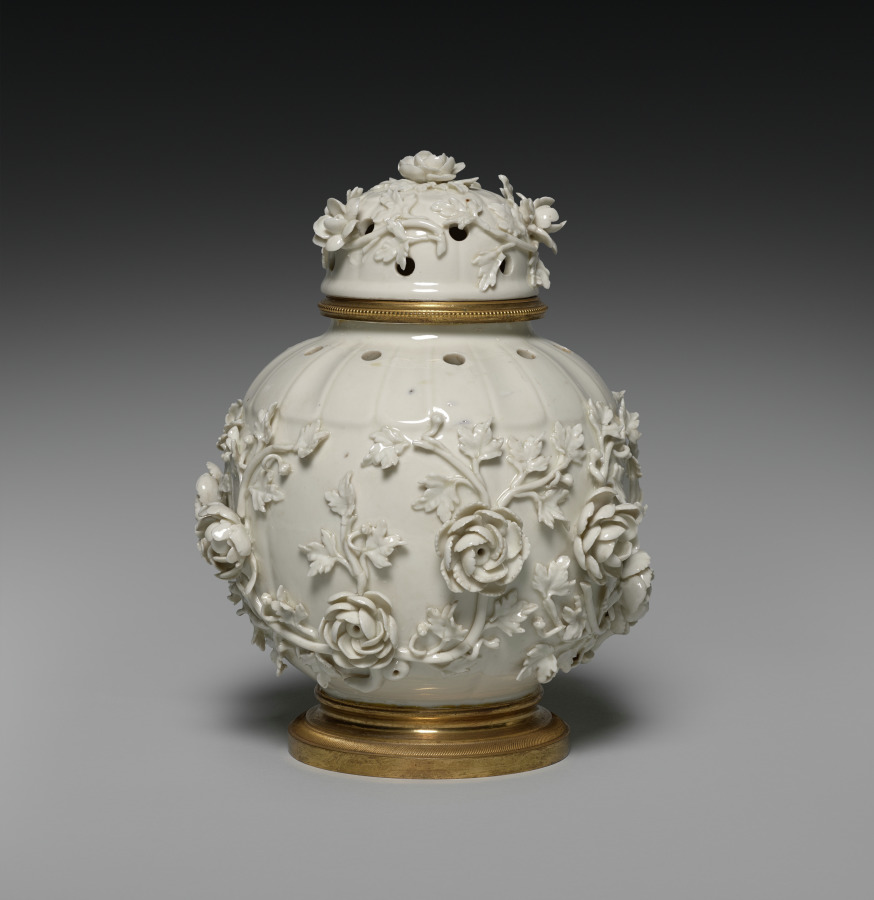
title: Potpourri Vase with Cover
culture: France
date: c. 1860–80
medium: blanc-de-chine porcelain; gilt bronze mount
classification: Ceramic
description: This vase was likely made by the celebrated Parisian ceramics firm of Edmé Samson (1810–91). To cater to the resurgence in taste for 18th-century designs, the Samson firm specialized in making reproductions of rare 18th-century European porcelains, especially those from firms that had already copied Chinese porcelains. In this case, this vase's design is taken from models produced by the Saint-Cloud factory in the 1750s after earlier Qing dynasty Chinese ceramics. However, the telltale sign that this vase is made by Samson and not Saint-Cloud is that the original would have been made from a soft-paste porcelain (fired at a lower temperature), while this example is made of hard-paste porcelain (fired at the highest temperature).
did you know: Potpourri vases always have holes in the top to let the scent of dried spices and flowers contained within freshen the air around them.